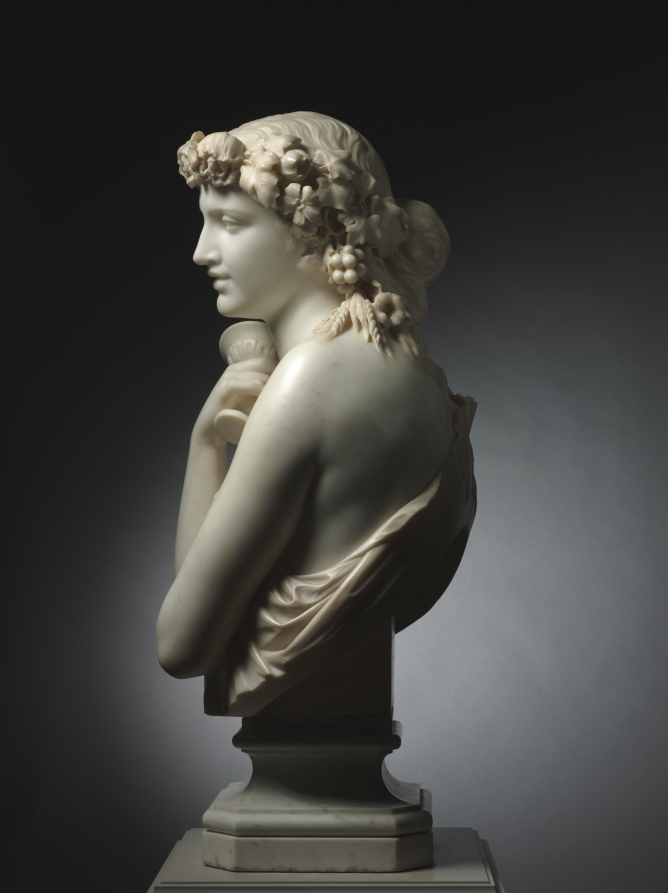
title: Bacchante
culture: France, 19th century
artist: Jean-Baptiste Clésinger (French, 1814–1883)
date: 1863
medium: marble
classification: Sculpture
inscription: signed below, on back of bust: J. Clésinger / Rome / 1836.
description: The French sculptor Auguste Clésinger spent much of his life in Rome, where this bust was created in 1863. He is particularly noted for the creation of sensual subjects in marble, such as this obviously inebriated Bacchante, a female companion of Bacchus, the Roman god of wine.